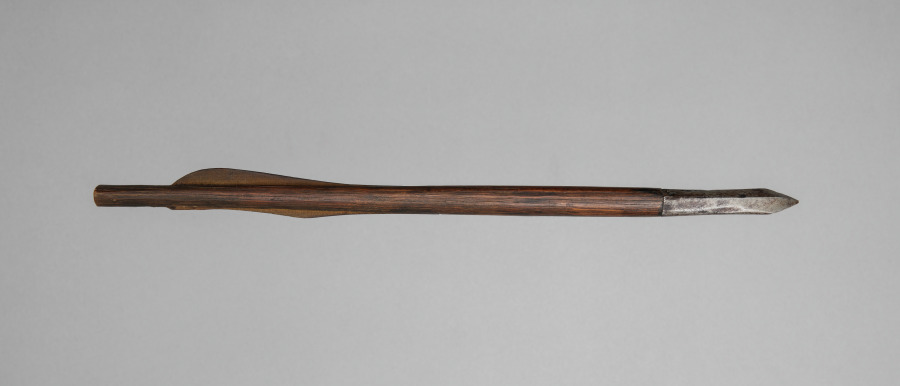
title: Crossbow Bolt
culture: Germany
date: 1500s-1600s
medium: wood, leather, steel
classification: Arms and Armor